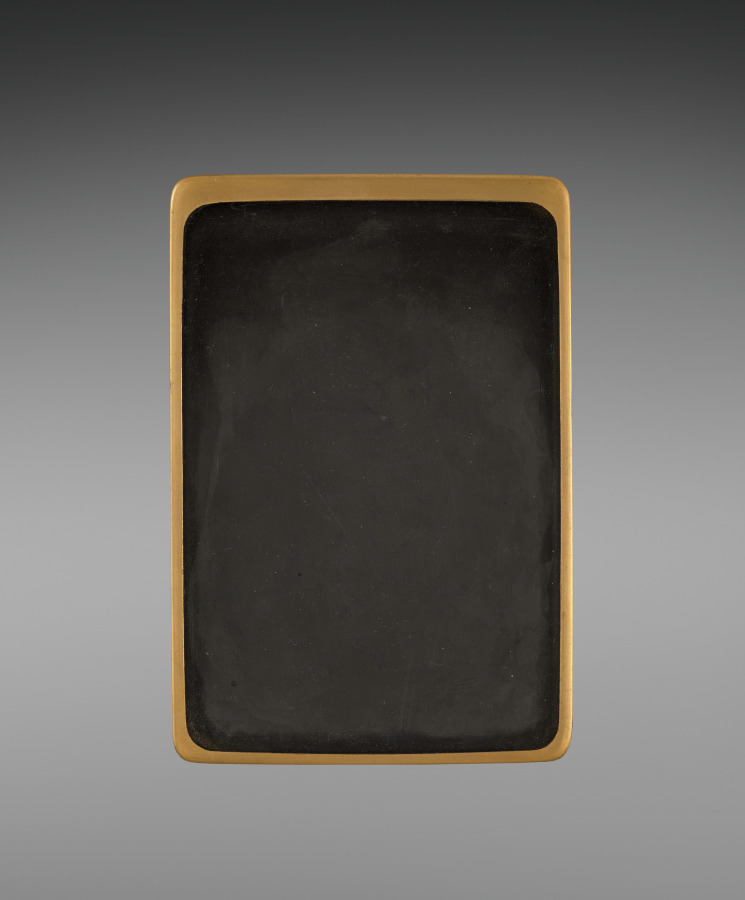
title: Writing Box (Suzuribako) with the “First Song” (Hatsune) Chapter from the Tale of Genji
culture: Japan, Meiji period (1868–1912)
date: early 1900s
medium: Lacquered wood with gold and silver sprinkled powder (maki-e), foil application (kirikane), and metal inlay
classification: Lacquer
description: The design of this box was inspired by an object in the 1639 lacquer wedding set of Chiyohime, the daughter of the shogun (ruler). Information about the set became available in the Meiji period, leading some lacquer artists to emulate its designs. This box features a scene from the chapter “First Song” (Hatsune) of the Tale of Genji, in which Prince Genji and his love Murasaki enjoy her garden. It incorporates the written characters for “first” (初, hatsu) and “sound” (音, ne), indicating the first song of the warbler in spring, associated with the new year—the water dropper for mixing the ink is in the shape of this bird.